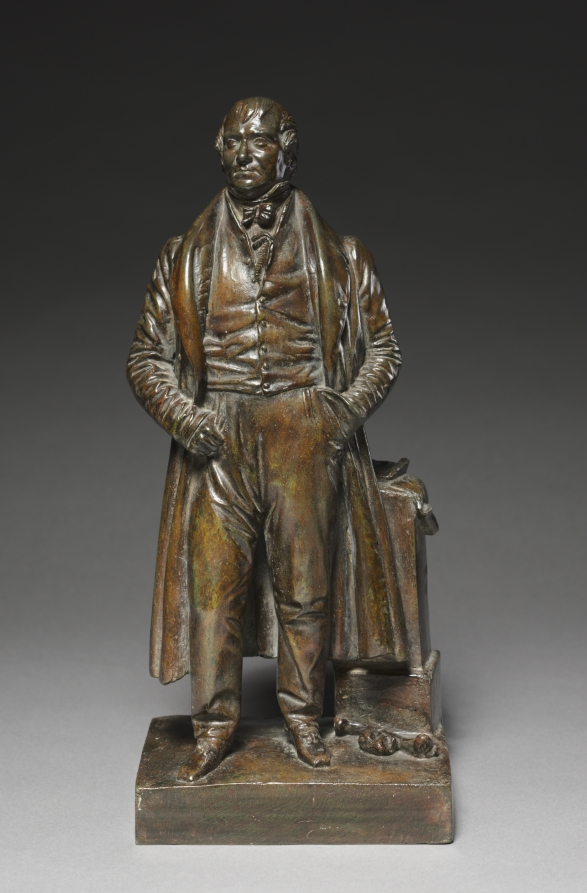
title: Portrait of Jean-Pierre-Joseph Darcet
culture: France, 19th century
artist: James Pradier (Swiss, 1790–1852)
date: 1834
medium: bronze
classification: Sculpture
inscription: signed an dated: "J. Pradier/ 1834"